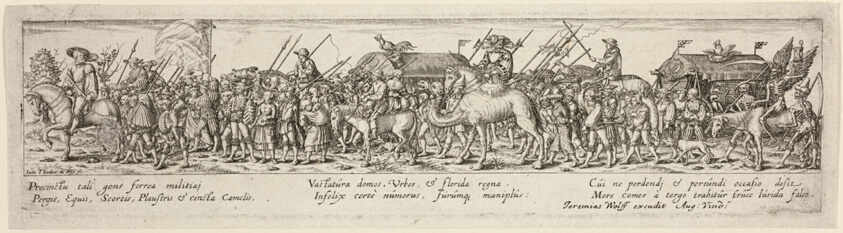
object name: Print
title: The Triumph of Death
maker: Johann Theodor de Bry (German, 1561-1623); after Erhard Schön (German, 1491-1542)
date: 1580/1600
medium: Engraving in black on ivory laid paper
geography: Germany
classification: engraving; print; prints and drawing